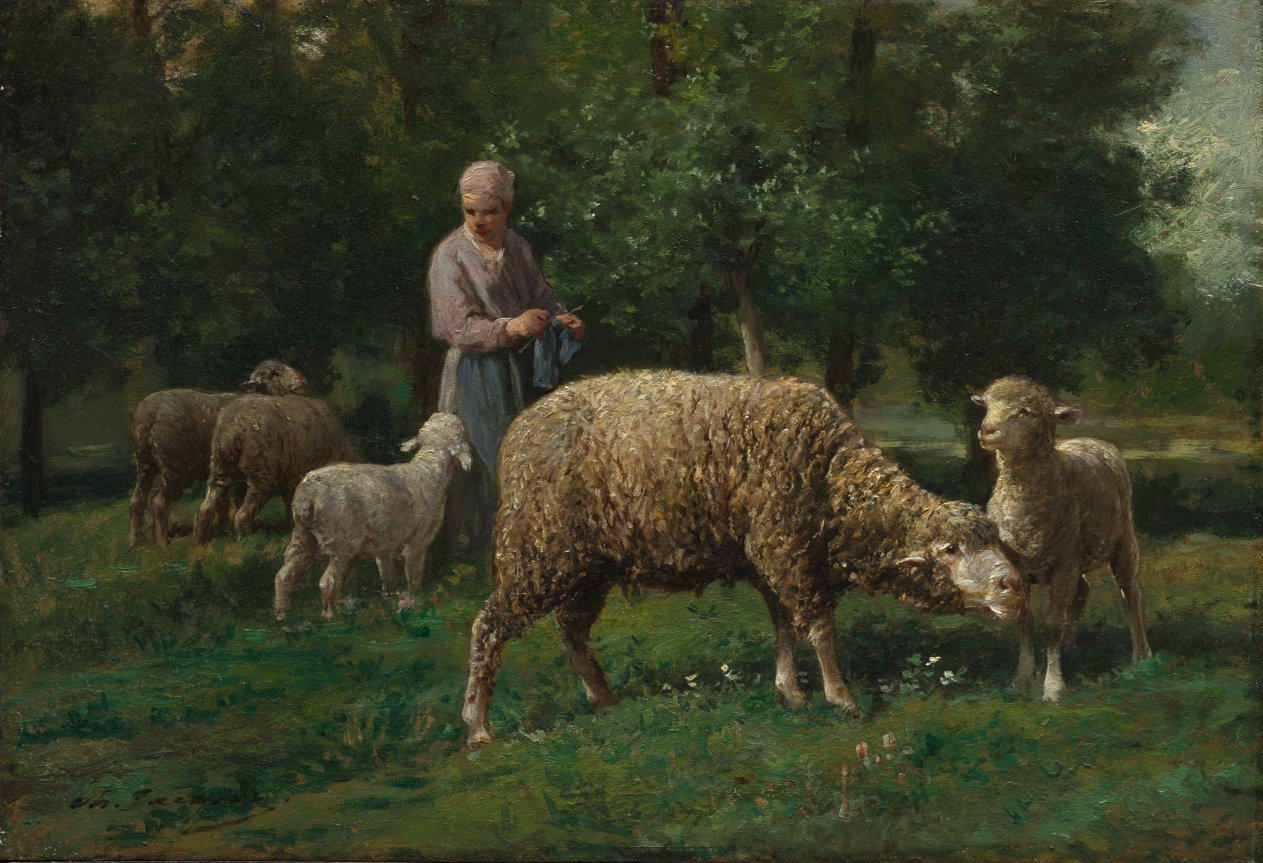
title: Shepherdess with Sheep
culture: France, 19th century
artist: Charles-Émile Jacque (French, 1813–1894)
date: c. 1876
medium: oil on wood panel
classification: Painting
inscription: Signed lower left: ch. Jacque